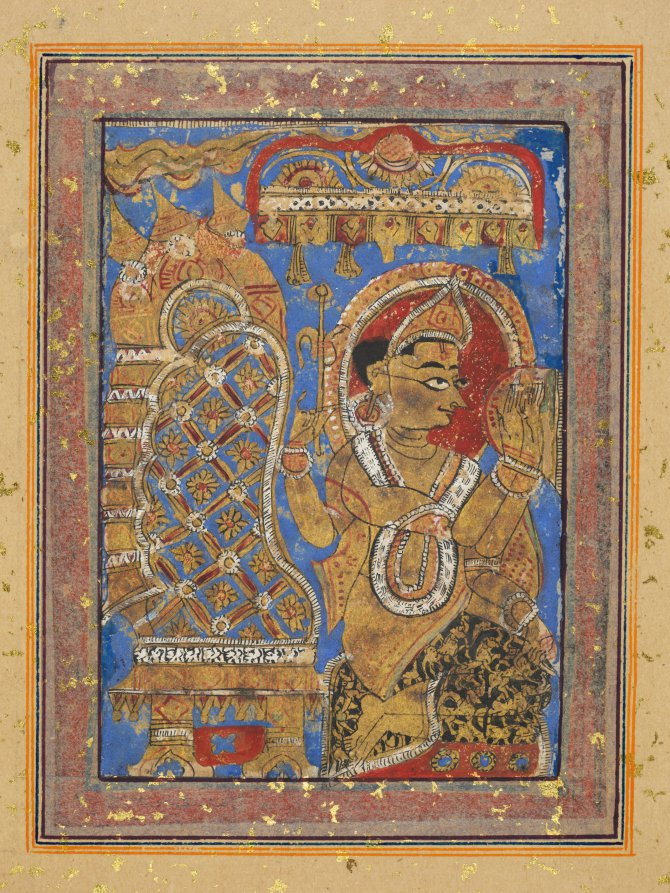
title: Painting from a Kalpa-sutra: Indra Praises the Embryo of Mahavira in the Womb of the Brahman Woman Devananda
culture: Western India, Gujarat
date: c. 1450–75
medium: Gum tempera and gold on paper; 18th century gold flecked paper border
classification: Painting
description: Until recently, and especially during the 1800s and early 1900s, the paintings in South Asian manuscripts were excised and mounted as individual works of art. These two paintings from a Jain manuscript of the Kalpa-sutra have been separated from the text and mounted with gold-flecked borders, like pictures in an album.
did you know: The four-armed king of the gods, Indra, got off his throne to kneel in praise of the conception of the 24th Jina Mahavira.